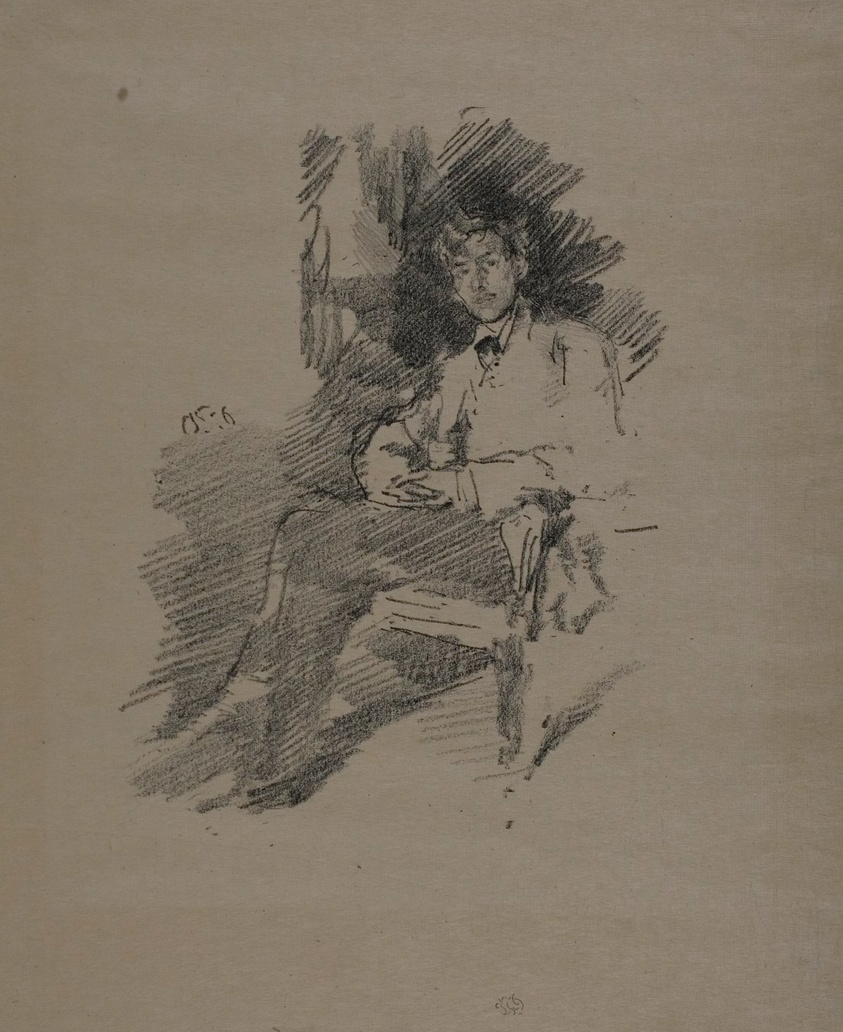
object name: Print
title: Walter Sickert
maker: James McNeill Whistler (American, 1834-1903)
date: 1895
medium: Transfer lithograph in black on cream laid Japanese vellum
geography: United States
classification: transfer lithograph; lithograph; print; prints and drawing